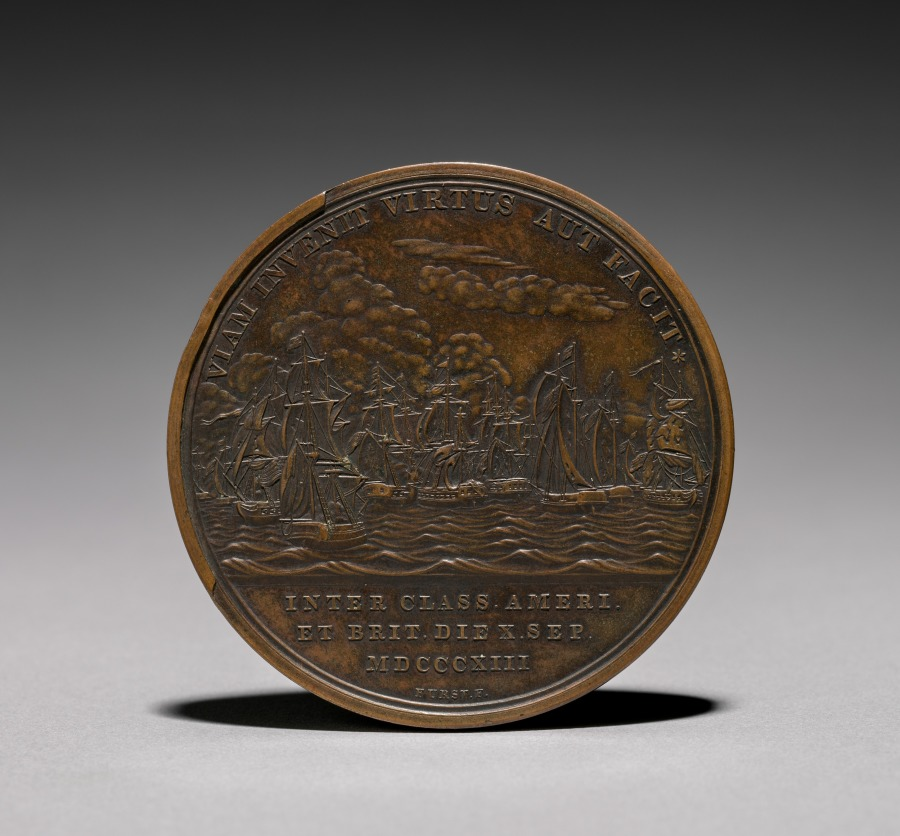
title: Medal Commemorating Commodore Oliver Hazard Perry (1785-1819) and the Battle of Lake Erie (reverse)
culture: America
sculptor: Moritz Fürst (Hungarian, 1782–1882)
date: 1813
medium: bronze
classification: Metalwork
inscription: Viam invernit virtus aut pacit; Inter class. Ameri. et Brit. die X Sept. MDCCCXIII.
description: This medal commemorating the Battle of Lake Erie on 10 September 1813 is one of a series of 27 medals commemorating American successes during the War of 1812, struck by special resolution of Congress. These medals were awarded to naval commanders in gold and to their officers in silver. The bronze examples are restrikes.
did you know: The United States naval forces, led by Commodore Oliver Hazard Perry (1785-1819), won a decisive battle over the British.